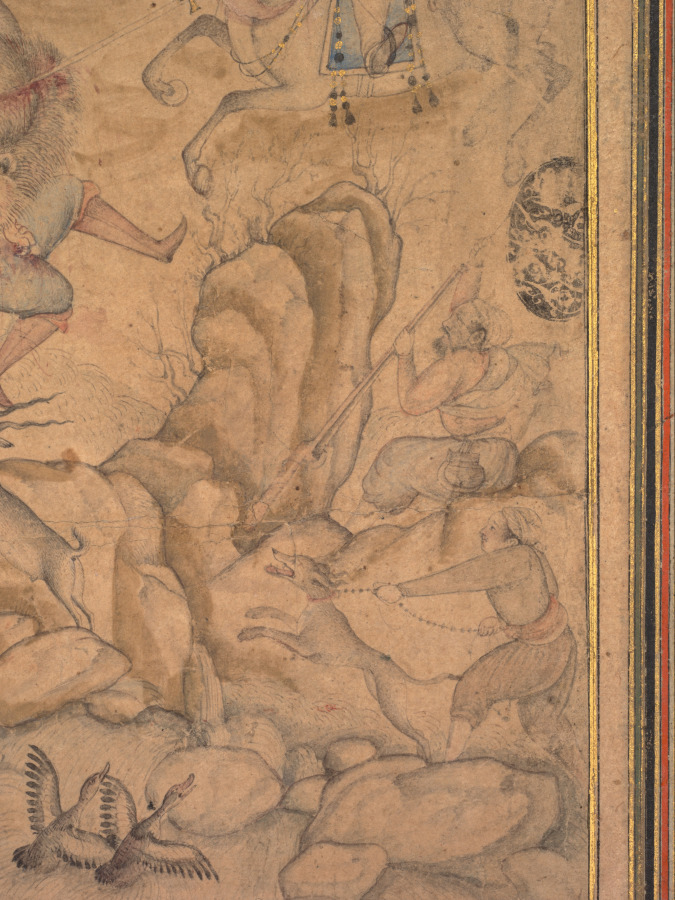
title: Princes hunting in a rocky landscape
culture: India, Mughal, 16th century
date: c. 1580–85; borders added c. 1700s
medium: Ink, slight color, and gold on paper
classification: Painting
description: The subdued palette of this tinted drawing belies the dire events of the scene. A group of Mughal nobles out hunting with falcons has chanced upon two lions in the wilderness, and one of the men has been attacked. The bearded figure with the falcon at the upper left and the huntsman about to retrieve a duck caught by one of the trained falcons at the lower left are reminiscent of an earlier work, Hunting with Falcons in a Landscape (CMA 2013.292), painted by a Persian artist. By the time this painting was made Akbar exerted more direct influence on his artists’ work, and it reveals his taste for dramatic action and climactic moments where life and death hang in the balance.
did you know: A hunter with gunpowder pouch hurriedly loads a musket with a scouring stick.